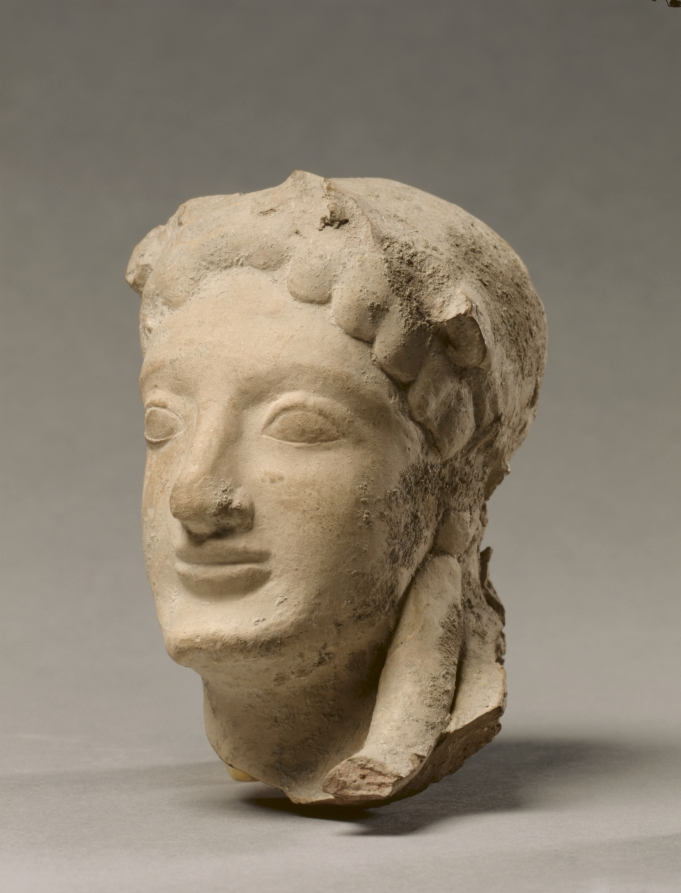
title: Head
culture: Greece, Sicily, Selinus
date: 525 BCE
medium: terracotta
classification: Sculpture